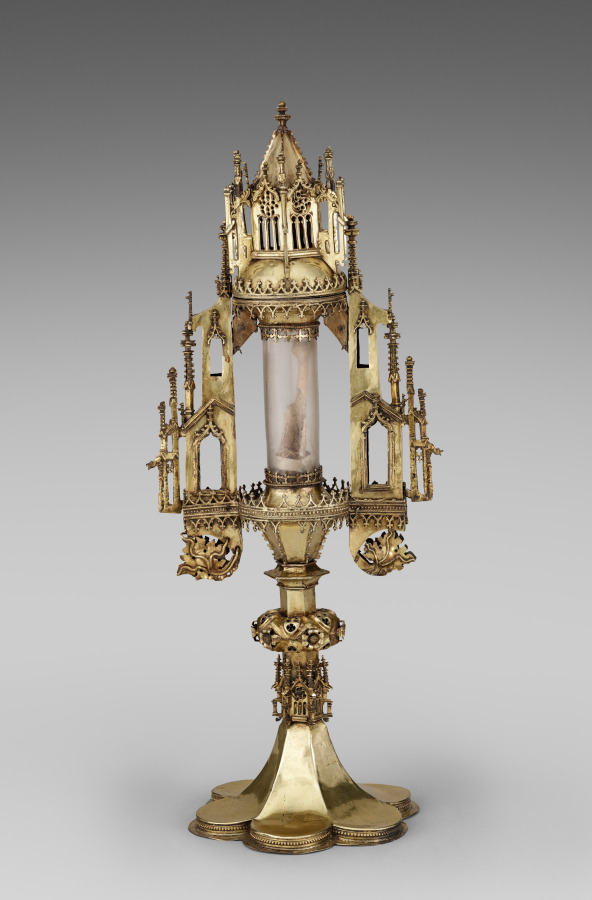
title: Monstrance with a Relic of Saint Sebastian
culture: Germany, Lower Saxony, Brunswick, Gothic period, 15th century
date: 1484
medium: gilded silver, rock crystal, bone, parchment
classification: Metalwork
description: This Late Gothic monstrance (from the Latin monstrare, "to show") is mentioned in the earliest inventory of Saint Blaise as "a large new monstrance containing relics of Saint Sebastian the martyr." Judging from surviving receipts, the reliquary was made by Werner Korff, a local goldsmith, who received payments for silver and gilding at the end of 1484. The reliquary was first displayed on the altar of the church of Saint Blaise in a solemn penitential mass on June 4, 1484, in an effort to ward off the plague. A recent examination revealed that the relic is a human metatarsal bone (one of five long bones of the human foot) and that its owner seemed to have suffered from periostitis, a medical condition that affects the connective tissue surrounding the bone.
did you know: In the Middle Ages, people suffering from diseases might make a journey, or pilgrimage, to venerate relics such as this one. The faithful believed that the remains of saints and holy people like Saint Sebastian could help those seeking aid such as relief from the plague.